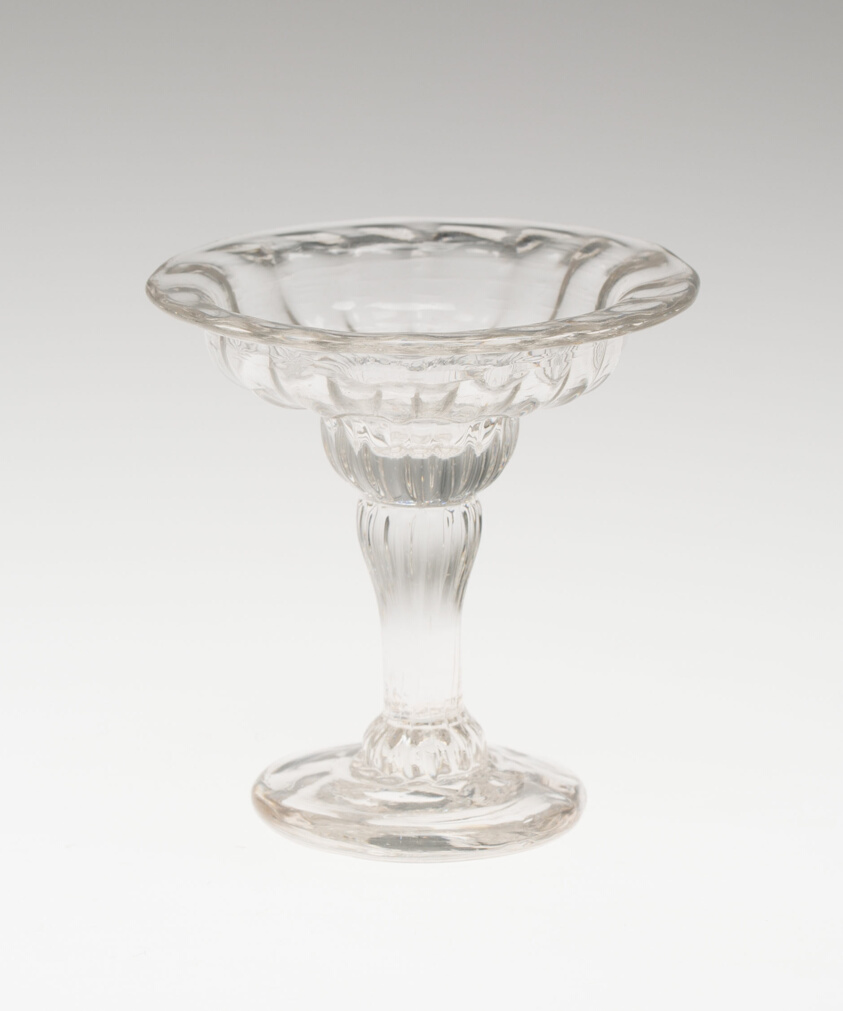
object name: Glass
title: Sweetmeat Glass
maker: England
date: 18th century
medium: Glass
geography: England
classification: glass